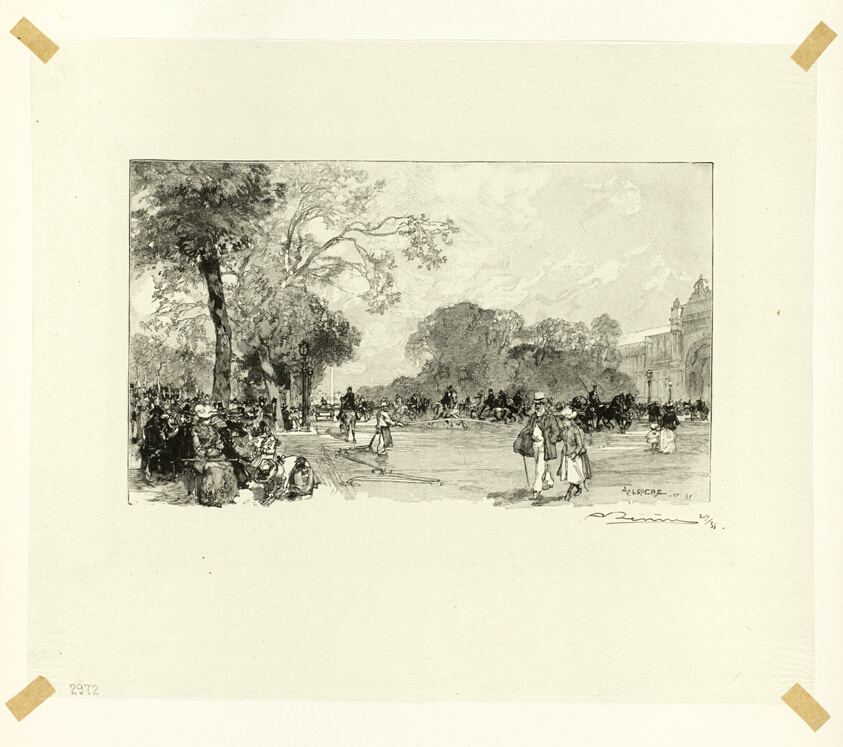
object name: Print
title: L'Avenue des Champs-Élysées, plate eighteen from Le Long de la Seine et des Boulevards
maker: Louis Auguste Lepère (French, 1849-1918); published by A. Desmoulins (French, active c. 1908-1910)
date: 1890, published 1910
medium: Wood engraving in black on cream Japanese tissue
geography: France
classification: wood engraving; print; prints and drawing